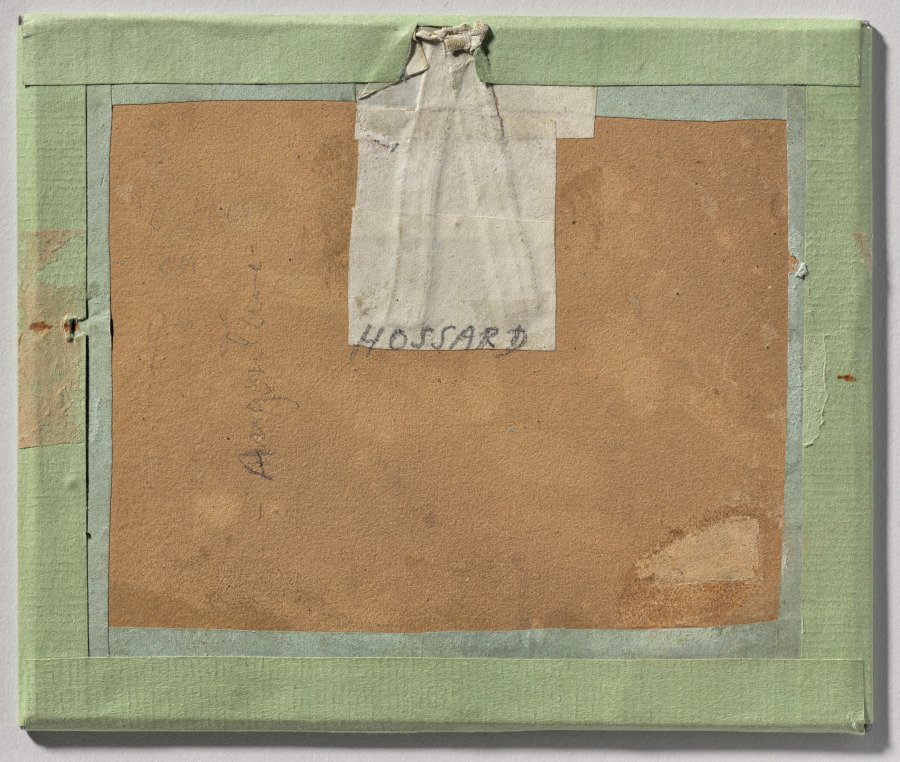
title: View of Angoulême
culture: France, 19th century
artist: Paul Michel Hossard (French, 1787–1862)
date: c. 1844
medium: daguerreotype, applied color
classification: Photograph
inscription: Written in pencil on verso: "HOSSARD"; Angoulême"; [additional writing in pencil is faded and unclear]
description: Paul Michel Hossard was an amateur daguerreotypist, especially noted for his architectural views. Rather than depicting a famous monument or landmark, this informal composition captures the charm of courtyards and houses in a small city in western France. The dominant horizontal lines of the buildings are contrasted with the soft, organic forms of the foliage. The presence of a breeze is suggested by the slight blurring of the tallest trees—the result of the long exposure time needed to make this image.